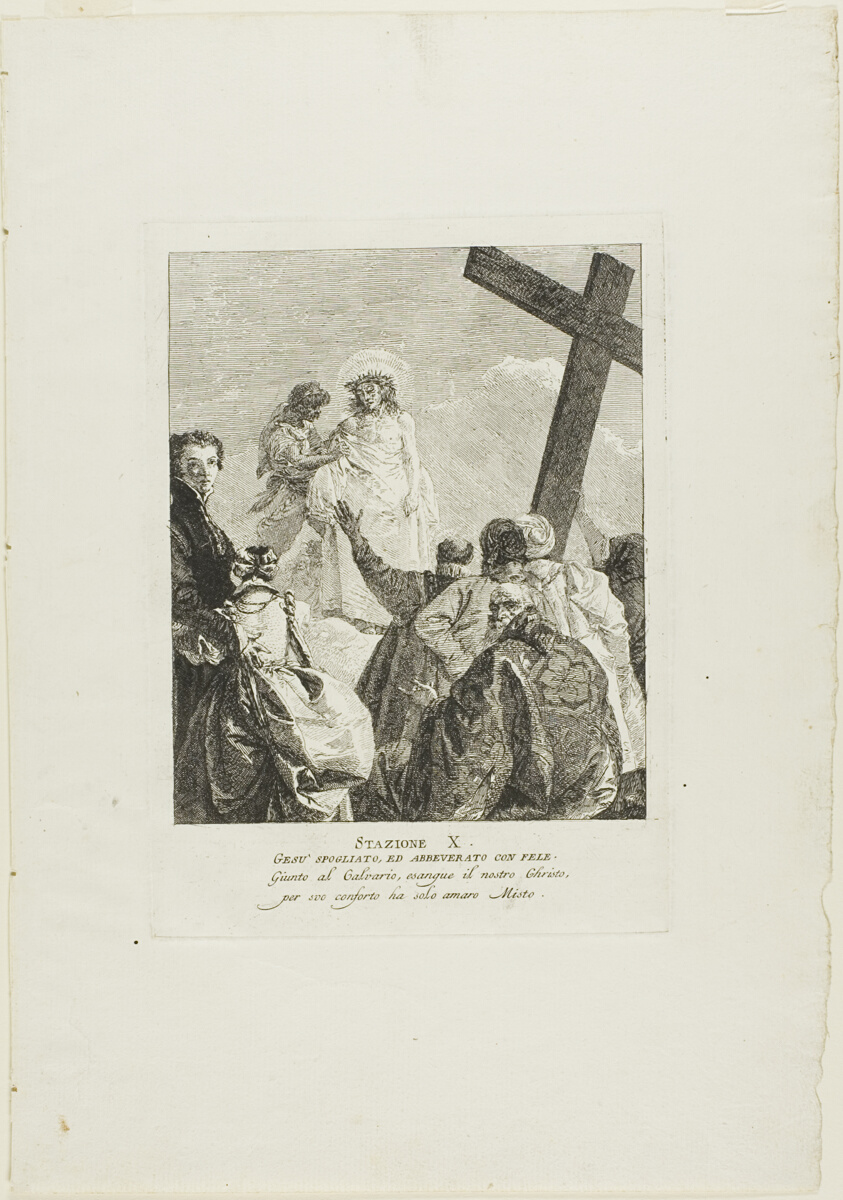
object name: Print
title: Christ is Stripped of His Garments, plate ten from Stations of the Cross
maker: Giovanni Domenico Tiepolo (Italian, 1727-1804)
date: c. 1748, published 1749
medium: Etching on paper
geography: Italy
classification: etching; print; prints and drawing